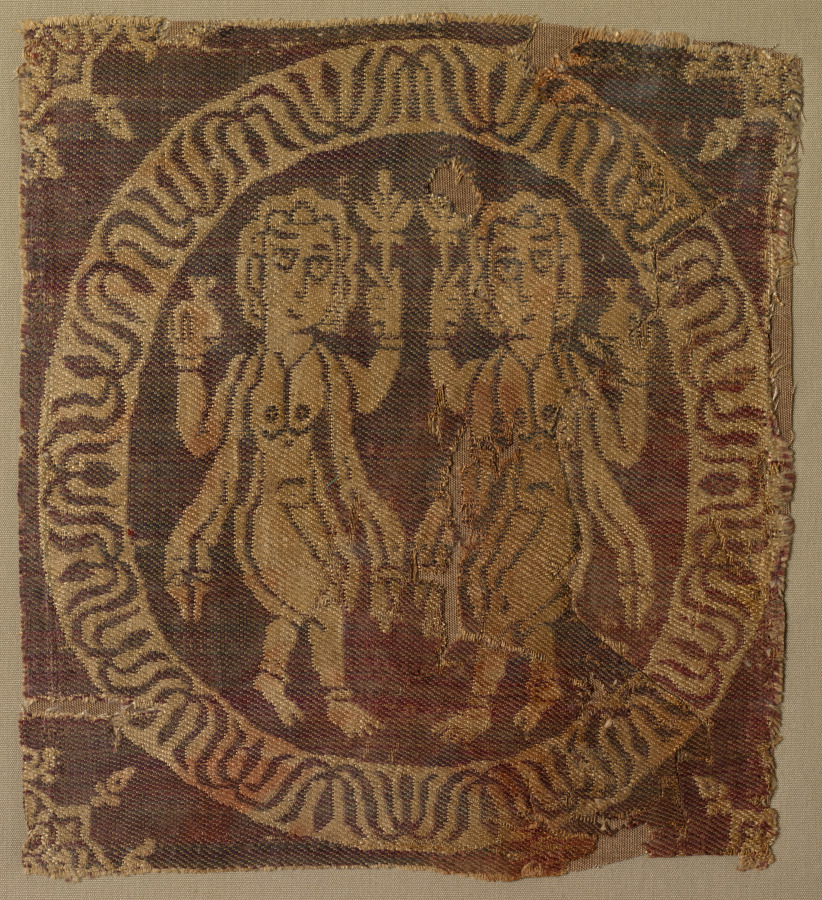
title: Nude Female Dancers from a Tunic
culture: Egypt or Syria, Umayyad period (661–750) or Abbasid period (750–1258)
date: 700s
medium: Silk; complementary weft-faced twill weave with inner warps (samite)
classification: Textile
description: Voluptuous females in sheer attire were not only depicted in contemporary wall paintings but also woven in lengths of silk fabric that were cut into squares to decorate linen tunics. These symmetrical female dancers, with anklets and long scarves draped around their shoulders, hold branches and pomegranates.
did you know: Four or six squares of this luxurious two-color silk were originally sewn on a linen tunic, two positioned above the hemline in the front and two in the back, and possibly two more at the shoulder. The folded edges are still visible, including a silk sewing thread on the right side. The brittle condition is evident in the numerous crisp breaks.